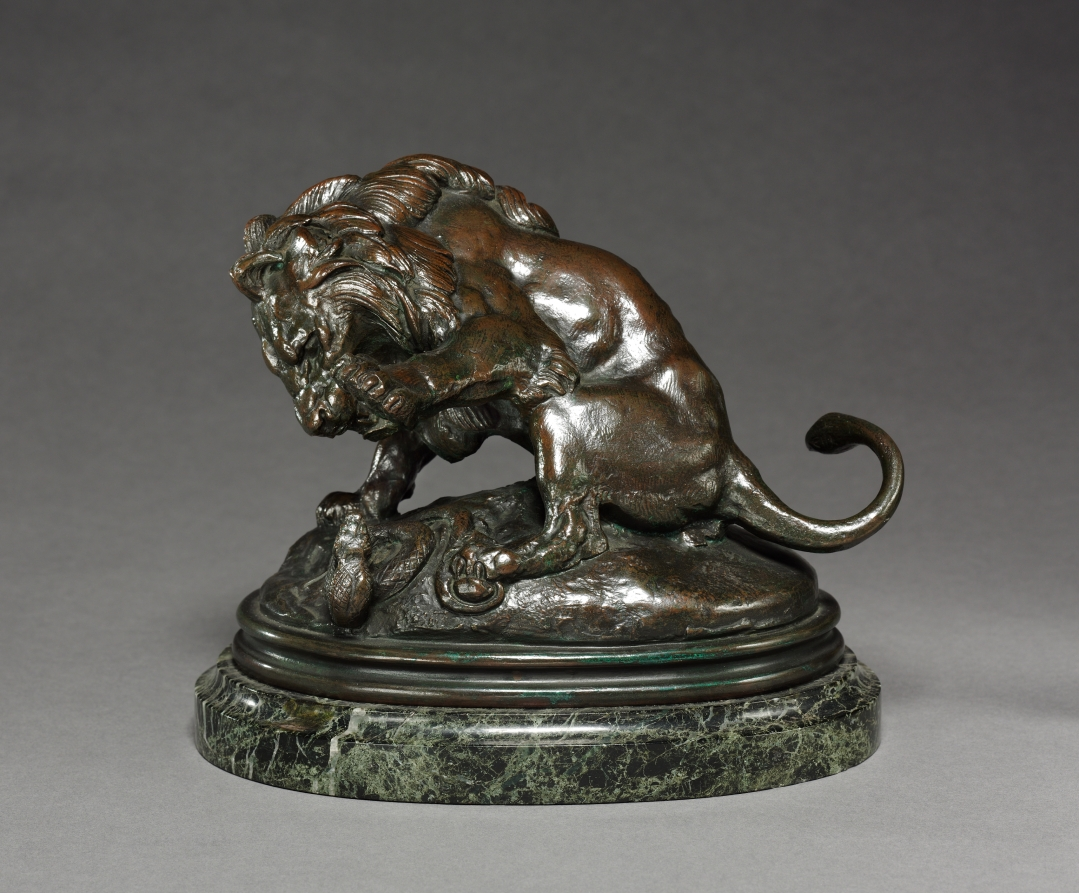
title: Lion and Serpent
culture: France, 19th century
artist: Antoine-Louis Barye (French, 1796–1875)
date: c. 1830 – 1875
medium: bronze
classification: Sculpture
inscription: Signed: "Barye"